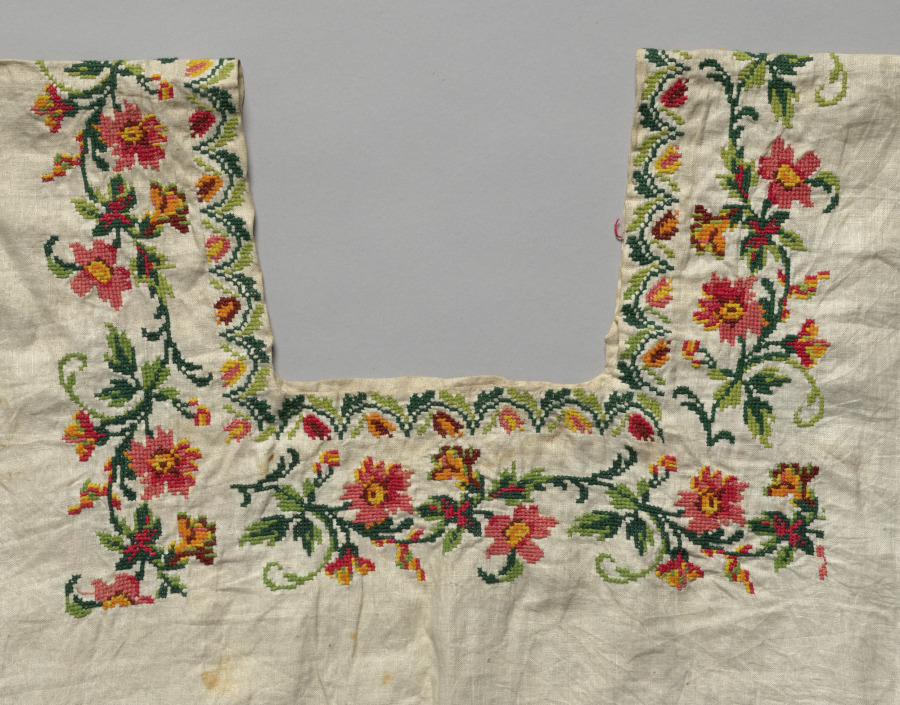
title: Embroidered Woman's Garment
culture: Mexico, Yucatan, 19th century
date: 1800s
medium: plain weave cotton; embroidered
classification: Embroidery